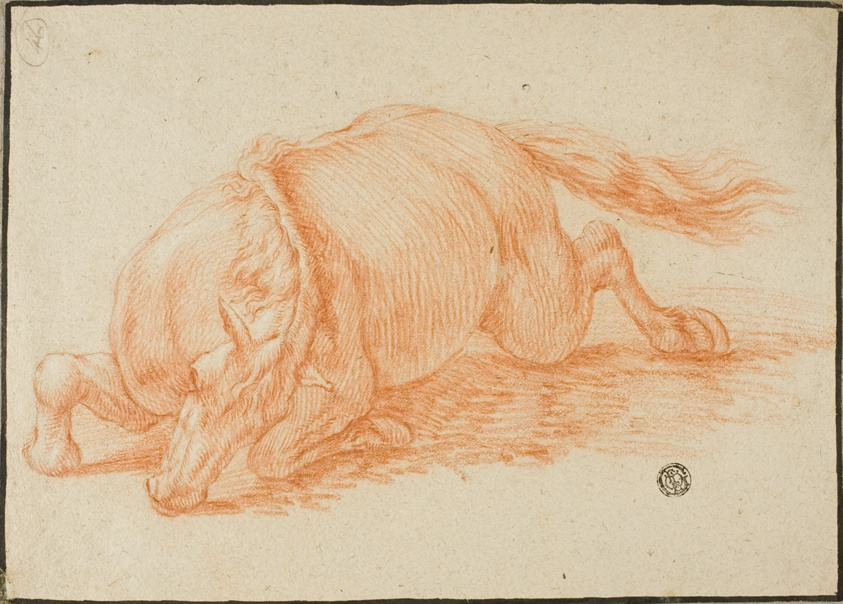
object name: Drawing and Watercolor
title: Falling Horse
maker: Adam Frans van der Meulen; Flemish, 1632-1690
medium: Red chalk over traces of graphite, on buff laid paper, tipped onto gray wove paper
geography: Flanders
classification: chalk; drawings (visual works); prints and drawing